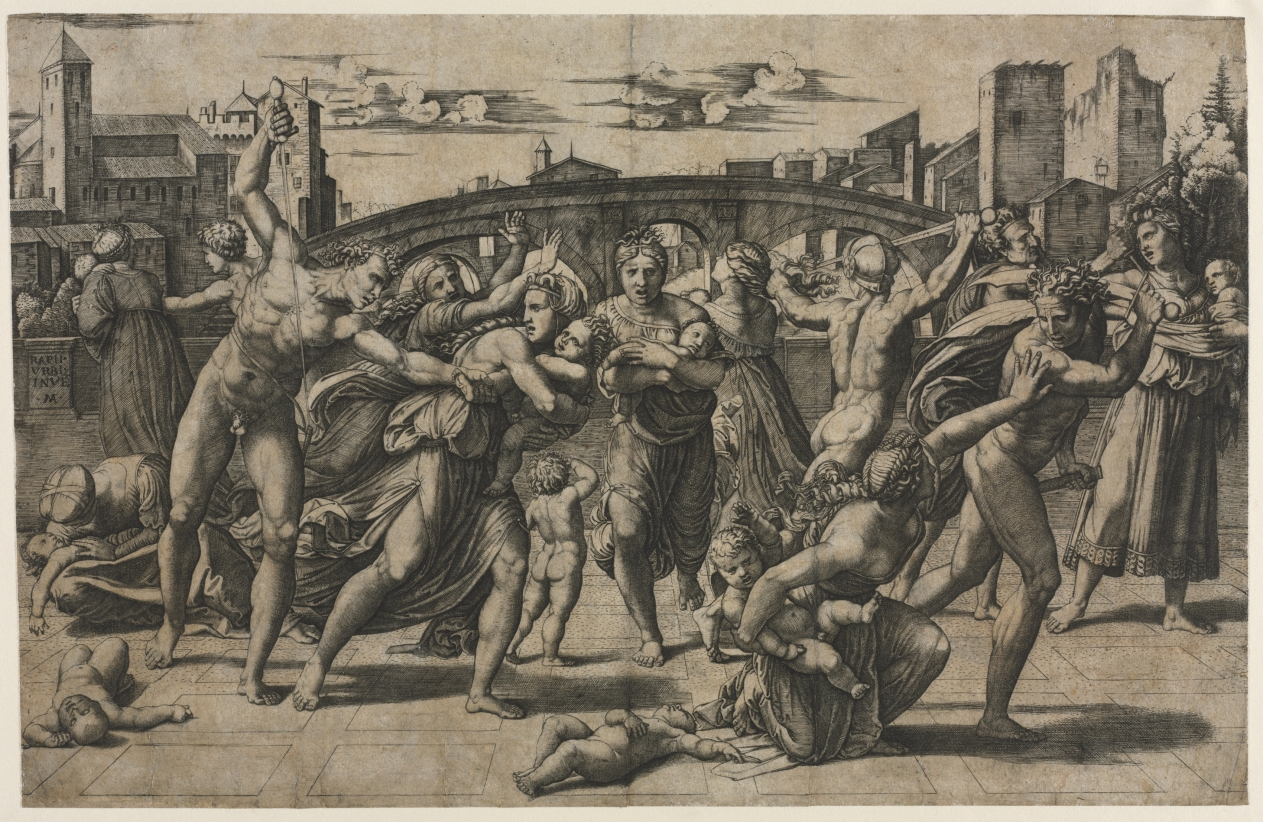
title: Massacre of the Innocents (With the Fir Tree)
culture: Italy, 16th century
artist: Marcantonio Raimondi (Italian, 1470/82–1527/34)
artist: after Raphael (Italian, 1483–1520)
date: c. 1511–12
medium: engraving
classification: Print